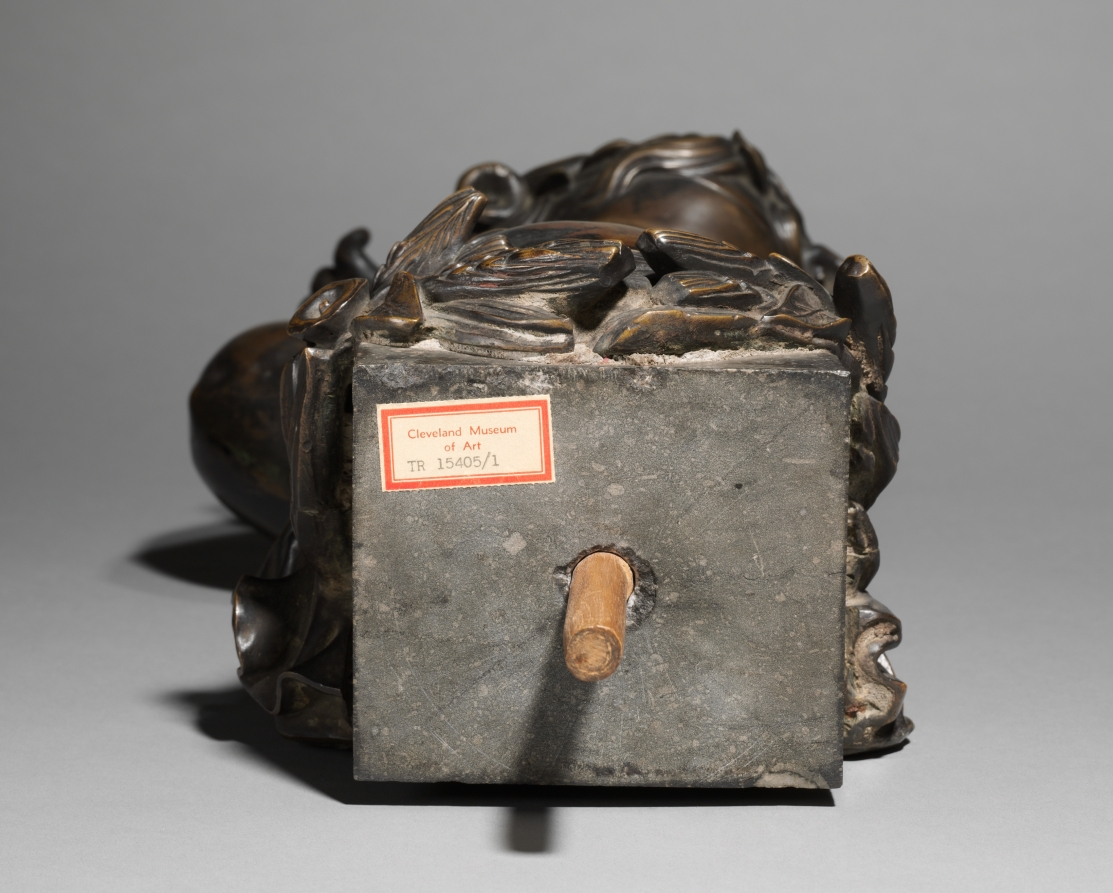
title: Autumn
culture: France, 19th century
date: 1800s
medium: bronze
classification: Sculpture